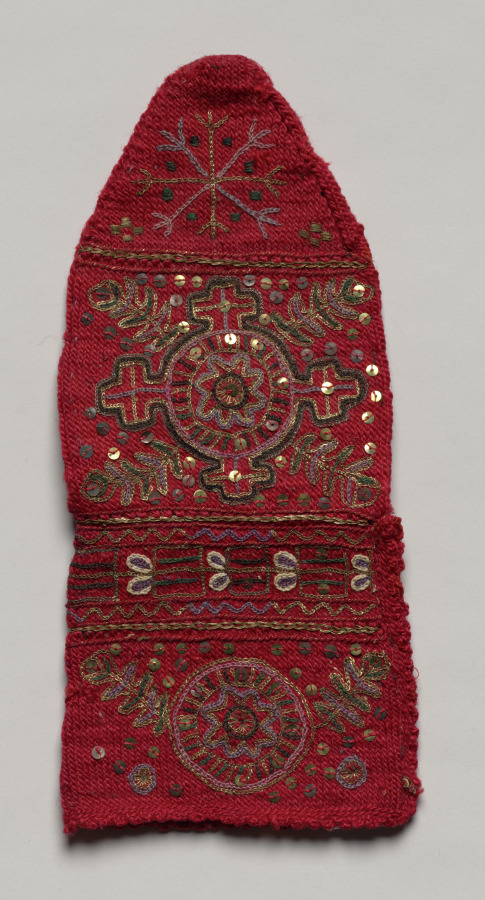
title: Woman's Bridal Socks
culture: Yugoslavia, Serbia, 20th century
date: early 1900's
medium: embroidered wool, gold thread, sequins, knitting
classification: Knitting